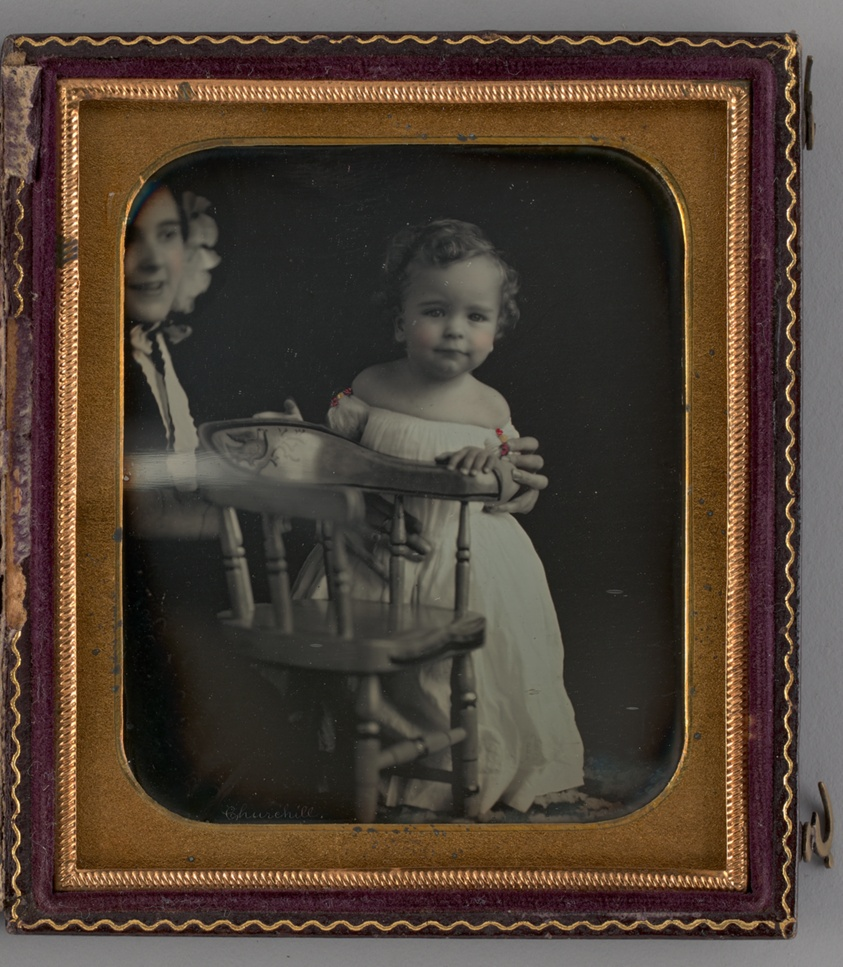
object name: Photograph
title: Untitled (Portrait of a Woman and a Girl)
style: 19th century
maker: R. Emmert Churchill; American, 19th century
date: 1852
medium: Daguerreotype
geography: United States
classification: portrait; photograph; photographic process; photography; portrait; daguerreotype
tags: lundberg collection, portraits, portraits: child subject, portrait, portraits: female subject, portraits: multiple subjects